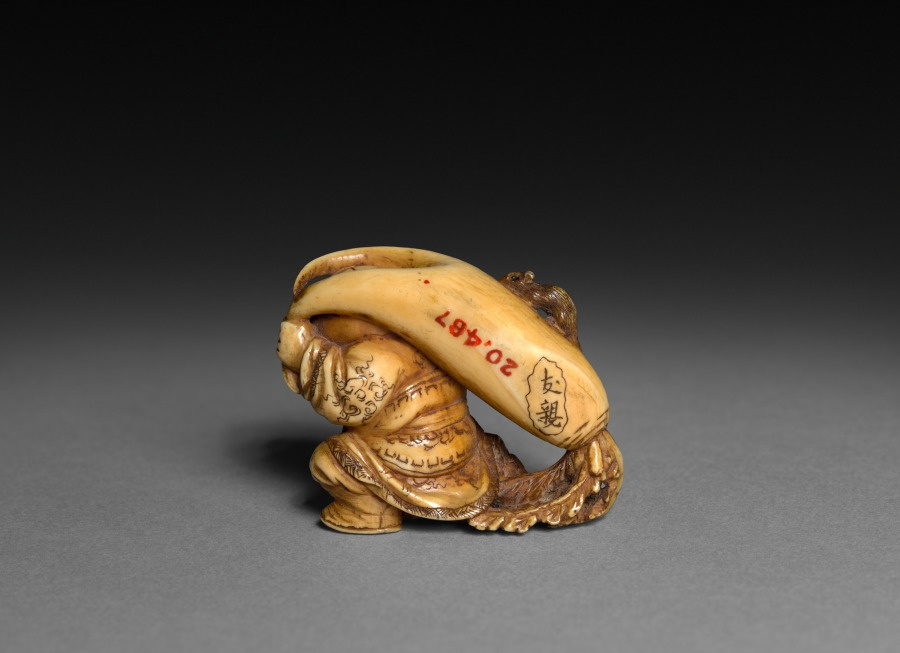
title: Daiitoku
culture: Japan, Edo period (1615–1868)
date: early to mid-1800s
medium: ivory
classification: Netsuke